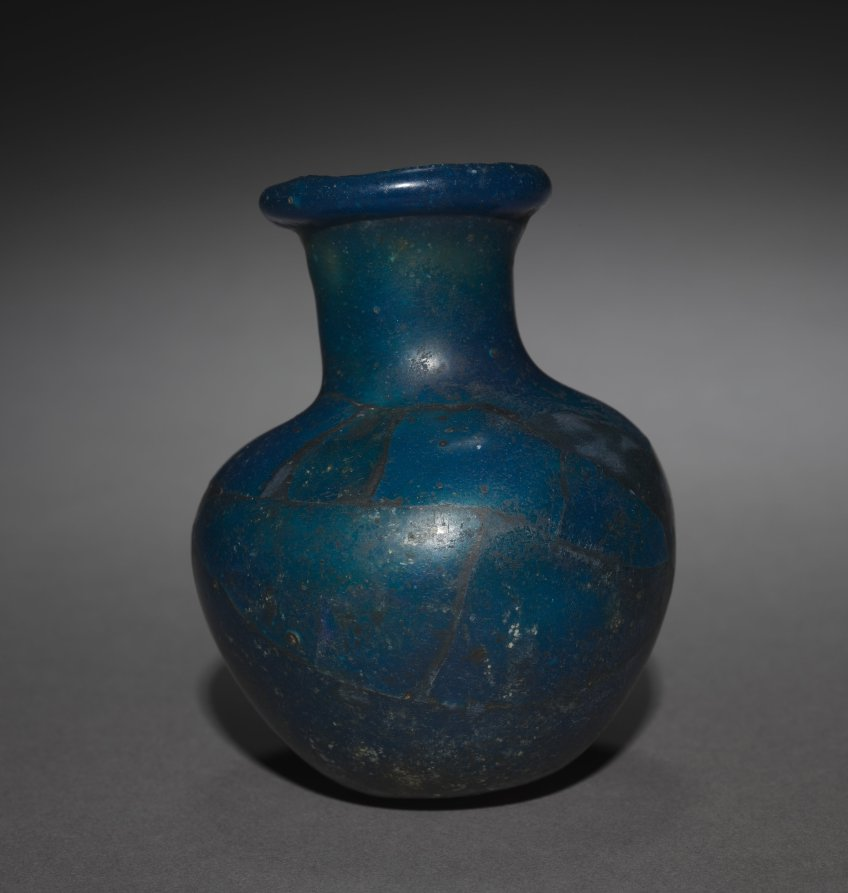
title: Long-Necked Flask with Strap Handle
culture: Egypt, New Kingdom (1540–1069 BCE), Dynasty 18, reign of Amenhotep III (1390–1352 BCE) or later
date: 1391–1353 BCE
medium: glass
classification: Vessels